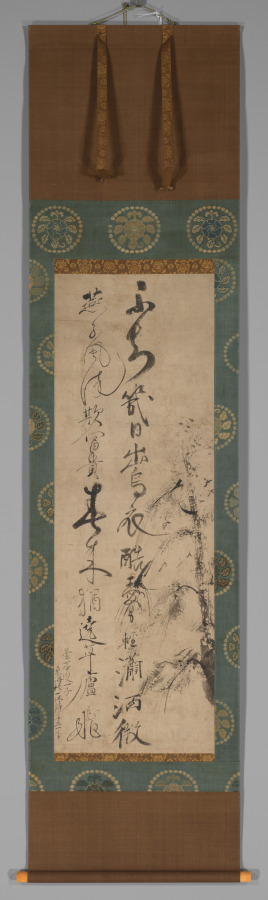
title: Calligraphy with Willow and Swallows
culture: Japan, Muromachi period (1392–1573)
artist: Ikkyū Sōjun (Japanese, 1394–1481)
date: 1400s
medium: hanging scroll, ink on paper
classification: Painting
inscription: How many days has it rid itself of the crow’s cloth? It knows not!/ Lovely is its body so nimble and neat./ Neither men of wealth, courtly position, or power can come close to the unfettered, noble swallow!/ With the coming of spring, it seems to be flying about, dancing around the grass hut of the foolish Priest. signed: Unkasō Isshi Tōkai jun Ikkyū shi ga ippitsu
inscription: outer box inscribed: Ikkyū Ōshō Enshi-zu Jigasan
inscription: inner box side lid inscribed: Showa 50 (1975), November by Tayama Honan with kao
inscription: Inner box side lid inscribed: Ikkyū Ōshō Bokuseki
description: The famed Buddhist monk Ikkyū is best remembered for his calligraphy. Calligraphic conventions of his time called for brushwork that did not vary much in style from character to character. However, as Ikkyū’s lines progress, his brushwork wanders between standard script and a sort of shorthand, marked by an uneven distribution of ink and a reduction of the characters to only the most necessary strokes. Ikkyū’s direct communication of emotion via brushwork became characteristic of the works produced by monks affiliated with the temple Daitokuji later in the Edo period (1615–1868).